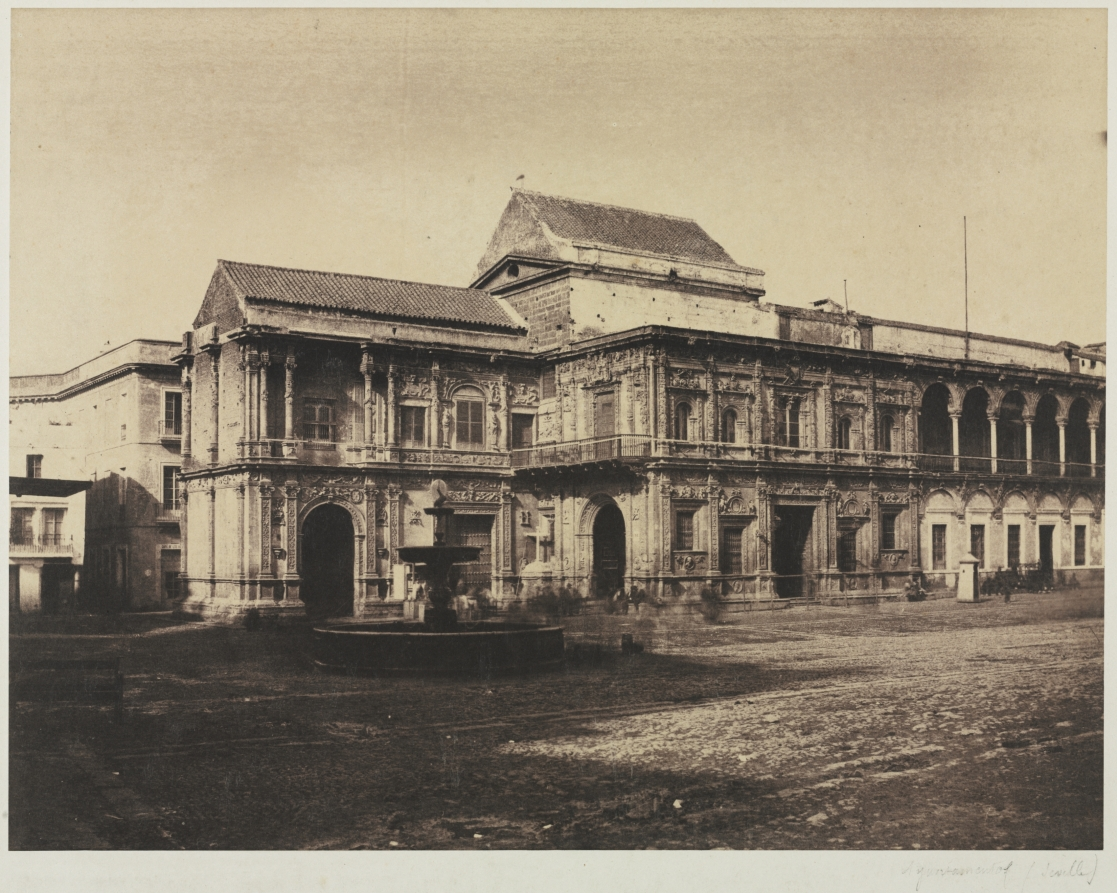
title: Townhall, Seville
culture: France, 19th century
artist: Vicomte Joseph Vigier (French, 1821–1862)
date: 1853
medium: salted paper print, waxed, from waxed paper negative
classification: Photograph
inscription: Written in pencil on recto of mount: "Ayuntamiento (Seville)"; "calotype"; on verso: "X2661". Printed in blue ink on attached sticker: "COLLECTION / MARGUERITE MILHAU / PARIS"